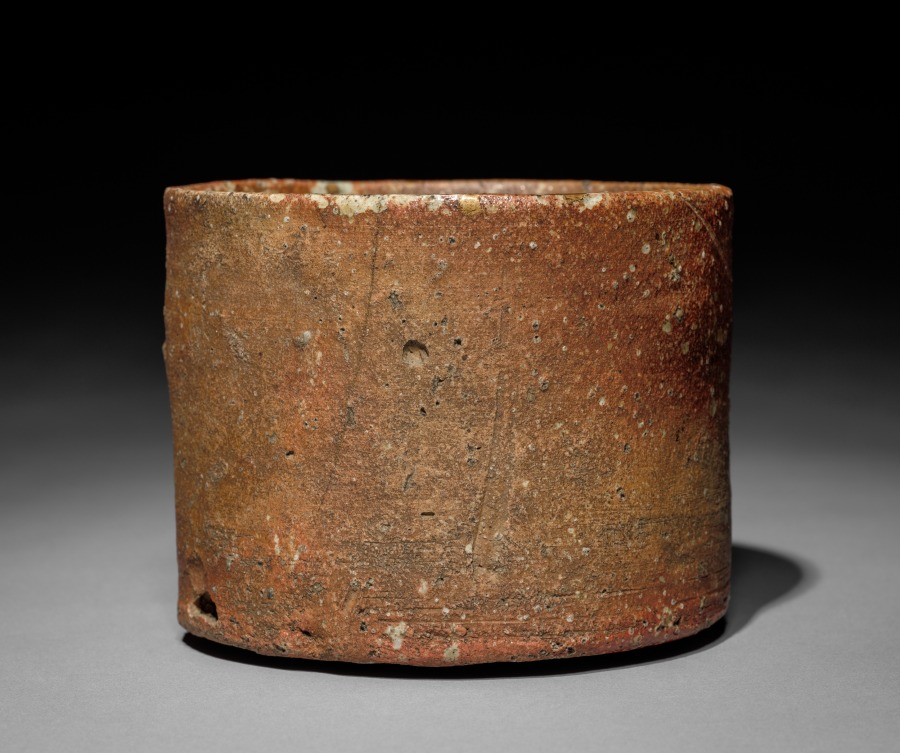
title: Tea Bowl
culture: Japan, Edo period (1615–1868)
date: 1600s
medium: stoneware with natural ash glaze (Shigaraki ware)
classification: Ceramic